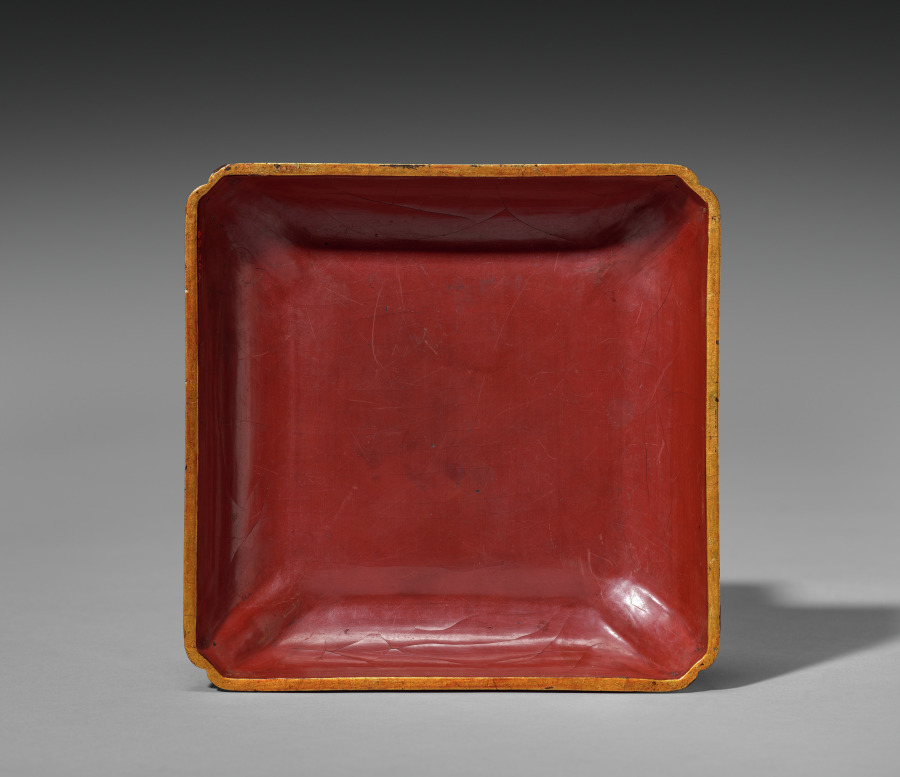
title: Wickerwork Box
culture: China, Ming dynasty (1368-1644), Wanli reign (1572-1620)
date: 1609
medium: lacquered wickerwork (of woven bamboo) framed in wood with circular scene inlaid in mother-of-pearl and gold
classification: Lacquer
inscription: Inscription at bottom in red on black lacquer reads: "commissioned by Yü-Yün-ch'i".